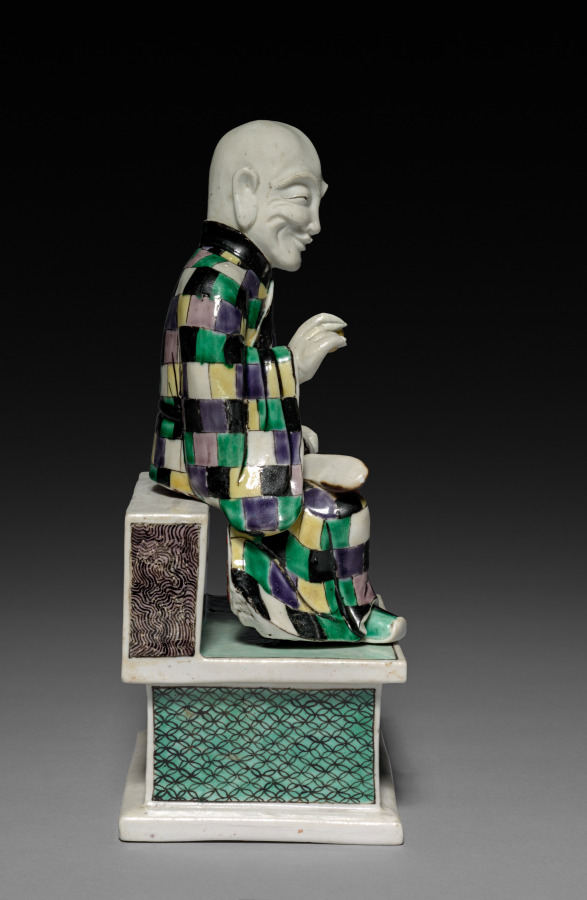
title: Lohan (Arhat) Holding a Peach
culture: China, Jiangxi province, Jingdezhen kilns, Qing dynasty (1644–1911), Kangxi reign (1662–1722)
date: 1662–1722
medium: porcelain with famille verte overglaze enamel decoration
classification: Ceramic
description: Lohan are disciples of Buddha with supernatural powers and eccentric behaviors. This lohan is holding the peach of longevity (shoutao), while its mate is holding the fu-dog, symbolizing good luck. With carefree smiles and playful gestures, these two figures embody a humorous attitude and a detachment from worldly affairs. This pair of porcelain figures was perhaps part of a house altar set or a decorative item in a household.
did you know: This lohan with a bald head wears a monk’s robe made of patches.